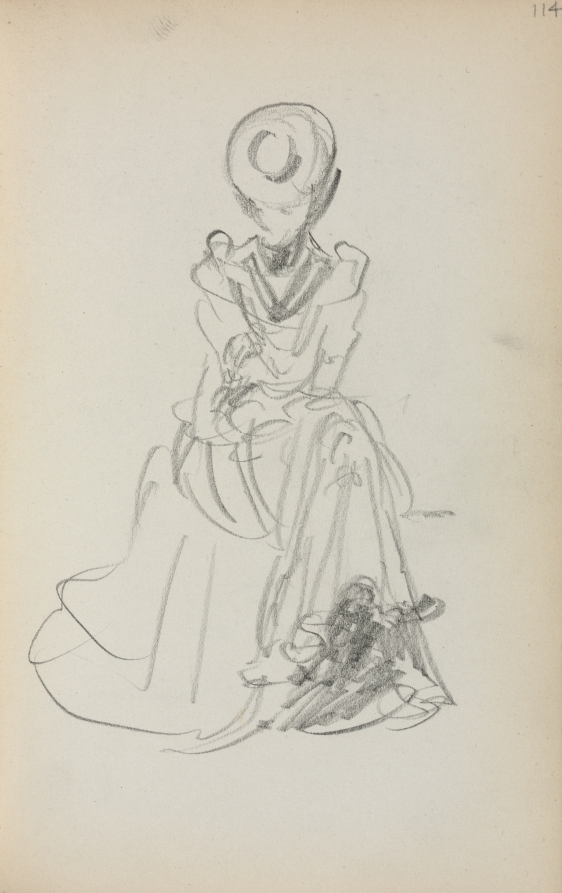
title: Italian Sketchbook: Seated Woman (page 114)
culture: America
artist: Maurice Prendergast (American, born Newfoundland [now Canada], 1858–1924)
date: 1898–1899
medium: pencil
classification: Bound Volume